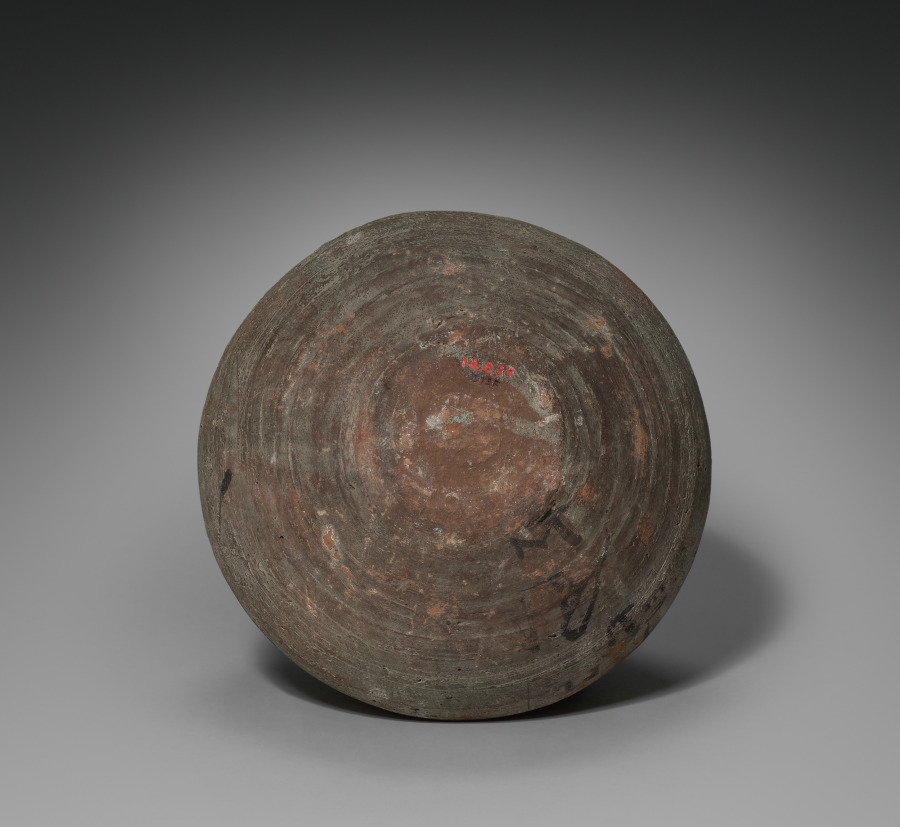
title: Shawabty Jar with Lid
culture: Egypt, New Kingdom (1540–1069 BCE), Dynasties 19–20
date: 1295–1069 BCE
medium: Nile silt ware; lid of limestone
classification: Funerary Equipment